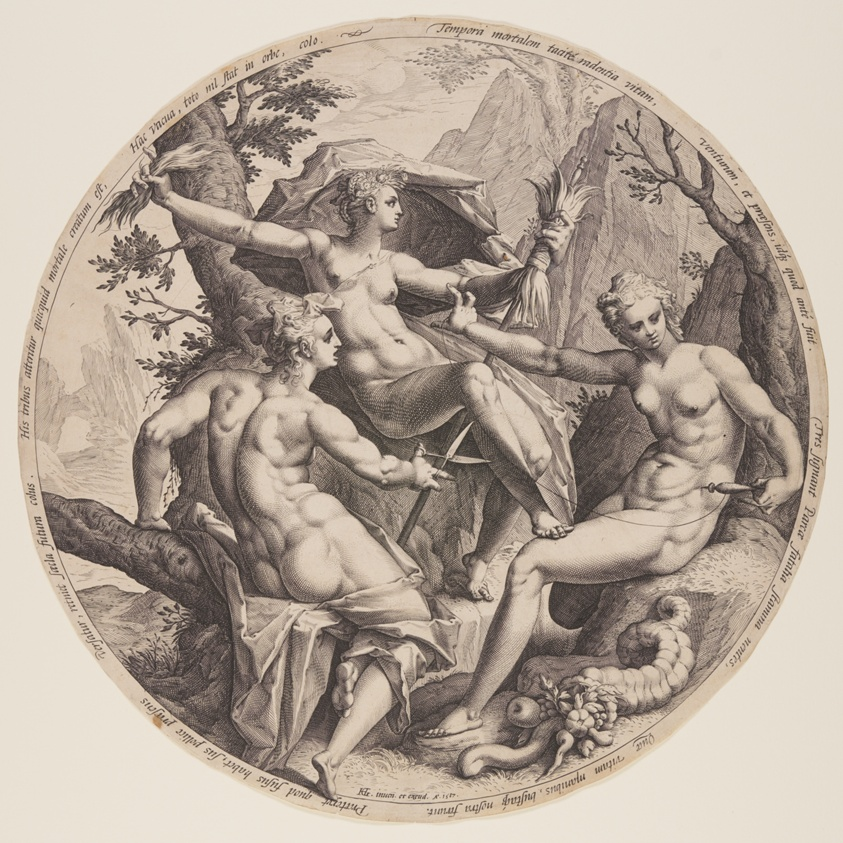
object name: Print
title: The Three Fates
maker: Attributed to Jacob Matham (Dutch, 1571–1631); after Hendrick Goltzius (Dutch, 1558–1617)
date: 1587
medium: Engraving on ivory laid paper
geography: Netherlands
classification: engraving; paper; print; prints and drawing